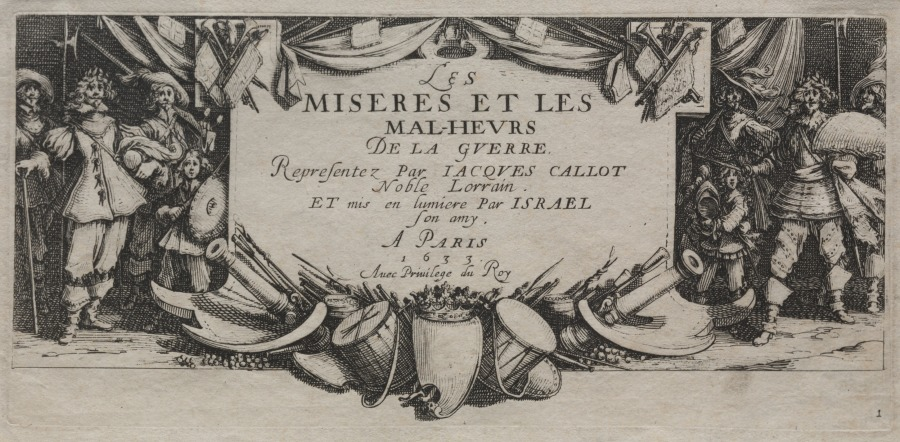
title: The Large Miseries of War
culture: France, 17th century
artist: Jacques Callot (French, 1592–1635)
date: 1633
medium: etching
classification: Print